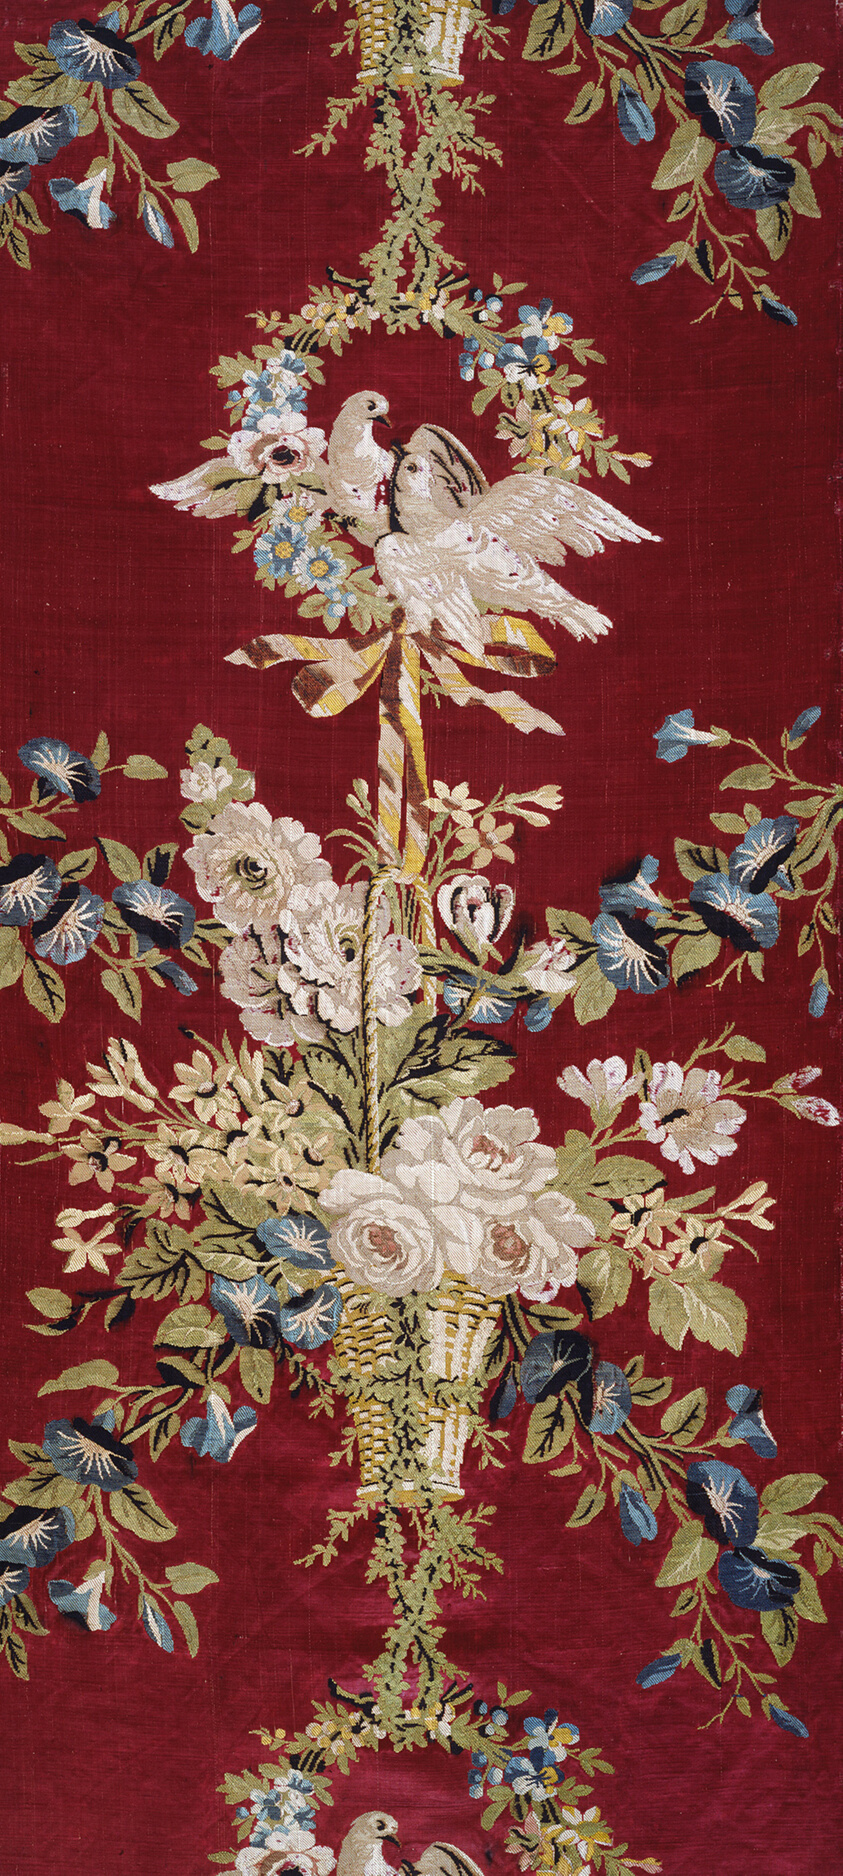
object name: Textile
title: Panel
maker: After a design by Philippe de LaSalle (French, 1723–1803/5); Woven and produced by Camille Pernon & Cie; France, Lyon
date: c. 1775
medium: Silk and linen, satin weave with brocading wefts; painted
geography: France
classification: textile; weaving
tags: flowers, animals, birds